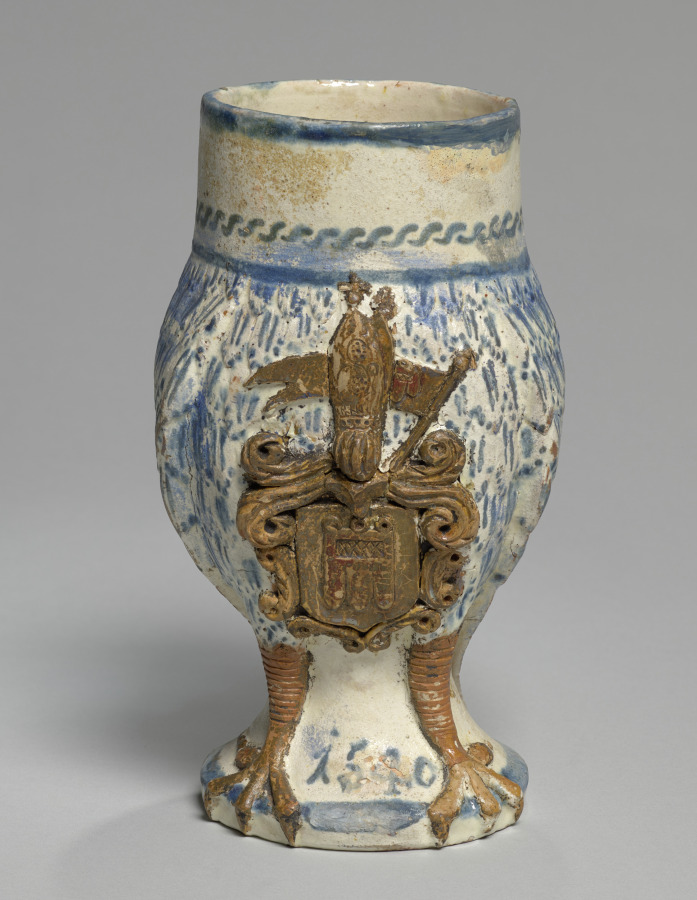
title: Owl (body)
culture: Southern Germany, 16th century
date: 1540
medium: faience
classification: Ceramic